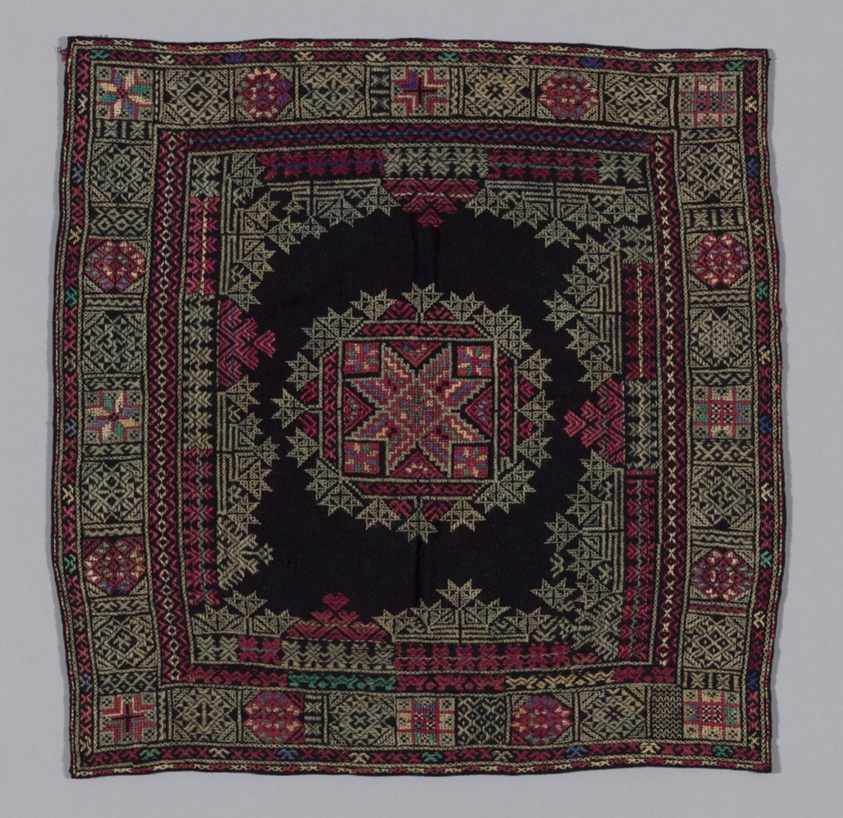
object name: Costume and Accessories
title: Head Cover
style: qing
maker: China, Hainan Dao; Hainan Island off South China coast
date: 1900, Qing Dyanasty (1644–1911)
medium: Cross stitch designs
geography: China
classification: textile; weaving; costume